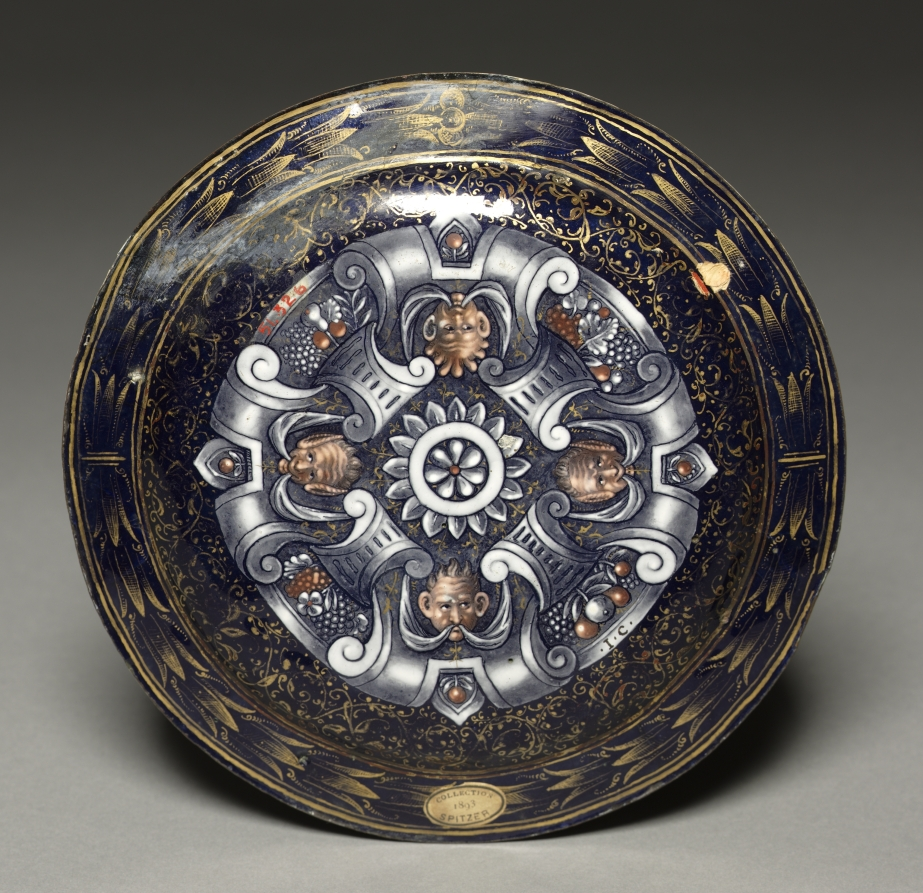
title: Plate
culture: France, Limoges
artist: Jean II de Court (French, before 1583)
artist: or Jean Courtois (French)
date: mid- to late 1500s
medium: painted enamel on copper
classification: Enamel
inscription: initialled: I. C. [identified with Jean II de Court or Jean Courtois]